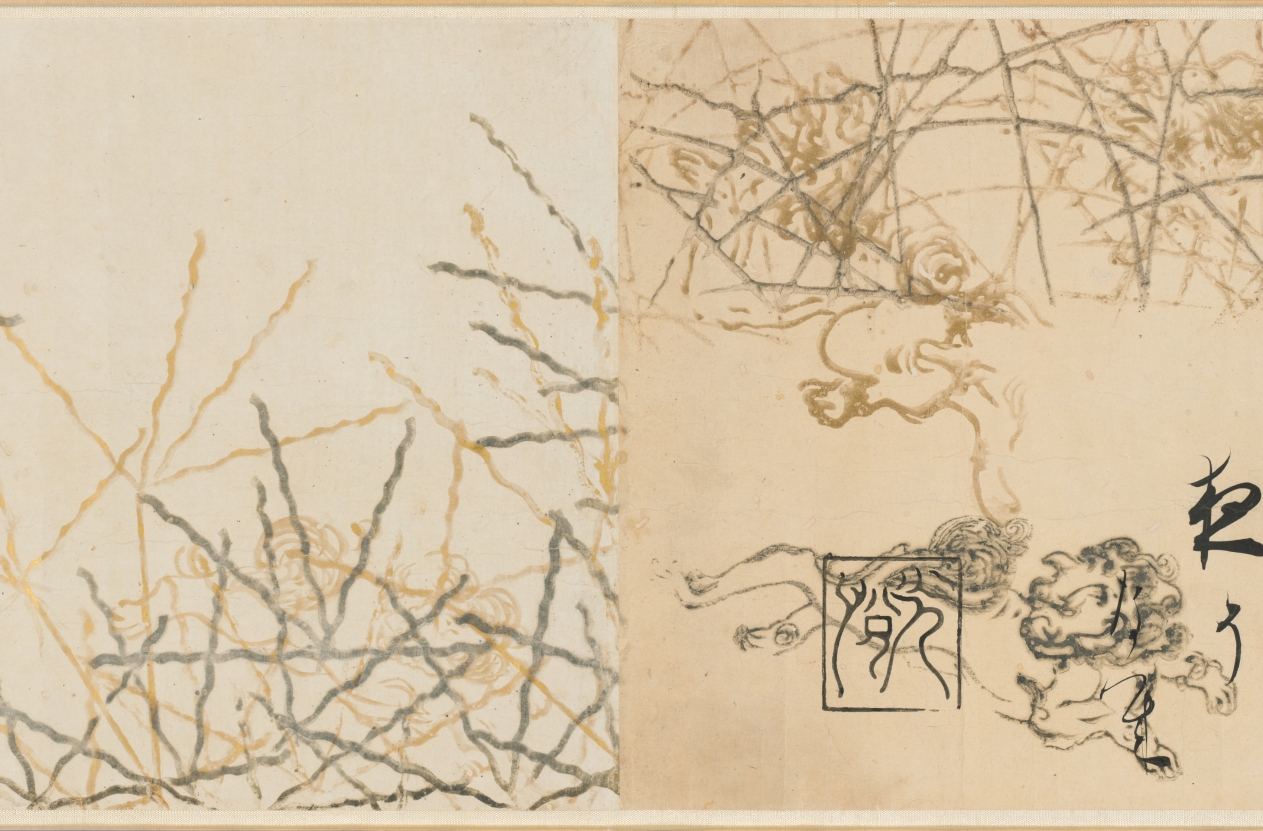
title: Selections from the New Collection of Japanese Poems from Ancient and Modern Times (Shinkokin wakashū) with Printed Designs of Chinese Lions and Crab Finger Grass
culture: Japan, Edo period (1615–1868)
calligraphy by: Hon'ami Kōetsu (Japanese, 1558–1637)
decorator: Tawaraya Sōtatsu (Japanese, c. 1570–c. 1640)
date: early 1600s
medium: handscroll; ink, gold, and silver on paper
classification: Calligraphy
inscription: Seal: 光悦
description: Hon’ami Kōetsu was a calligrapher and craftsman who frequently collaborated with the painter Tawaraya Sōtatsu, considered the first master of the Rinpa school. Kōetsu brushed seven poems from the autumn section of a poetry anthology onto dyed paper with motifs designed and printed in gold and silver by Sōtatsu.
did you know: Before becoming a master painter of screens, Tawaraya Sōtatsu painted fans.